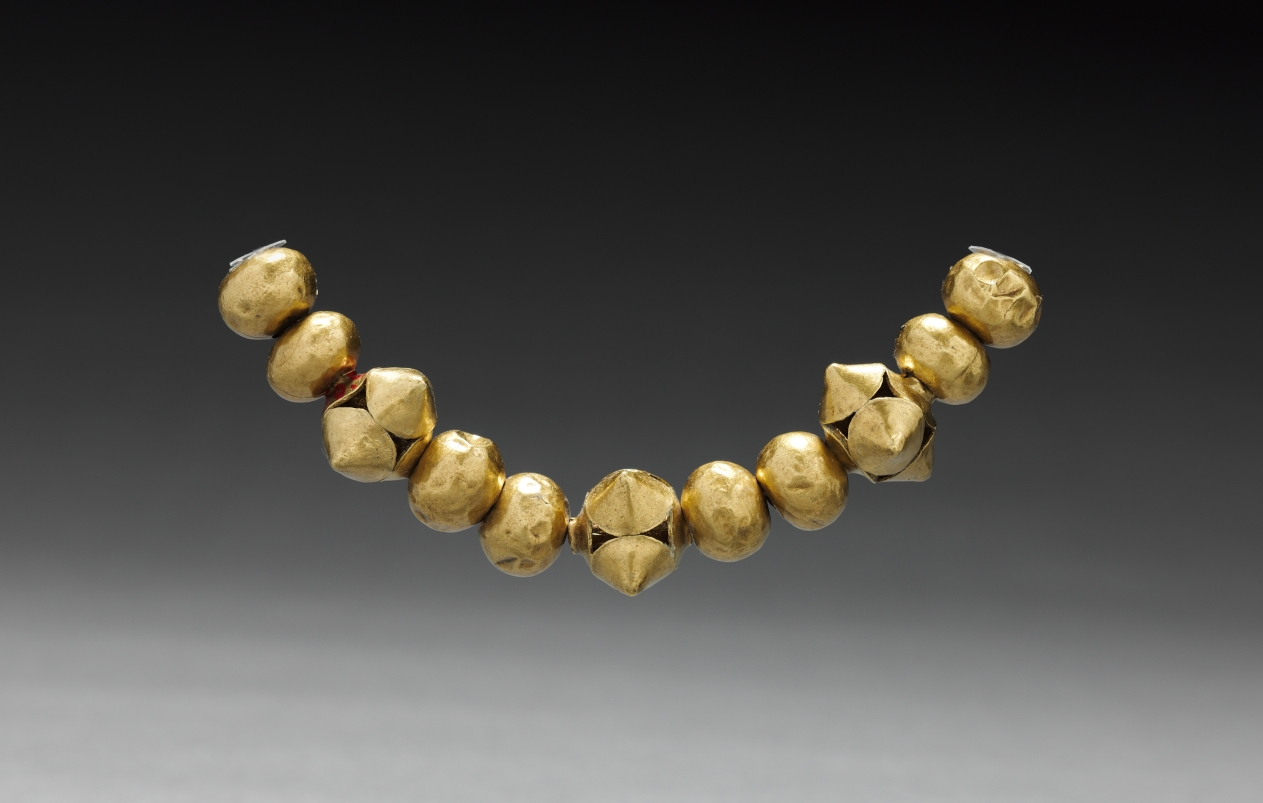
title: Beads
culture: Colombia, Muisca style(?)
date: c. 900–1550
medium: hammered gold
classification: Jewelry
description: The larger beads have pellets inside, and tinkle when shaken.